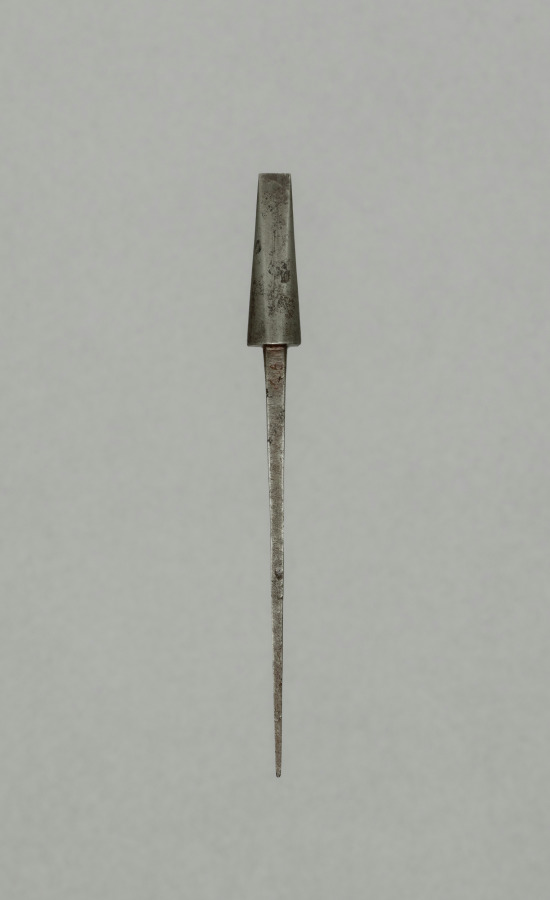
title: Arrow Point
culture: Japan, Edo period (1615–1868)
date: 1700s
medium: steel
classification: Arms and Armor